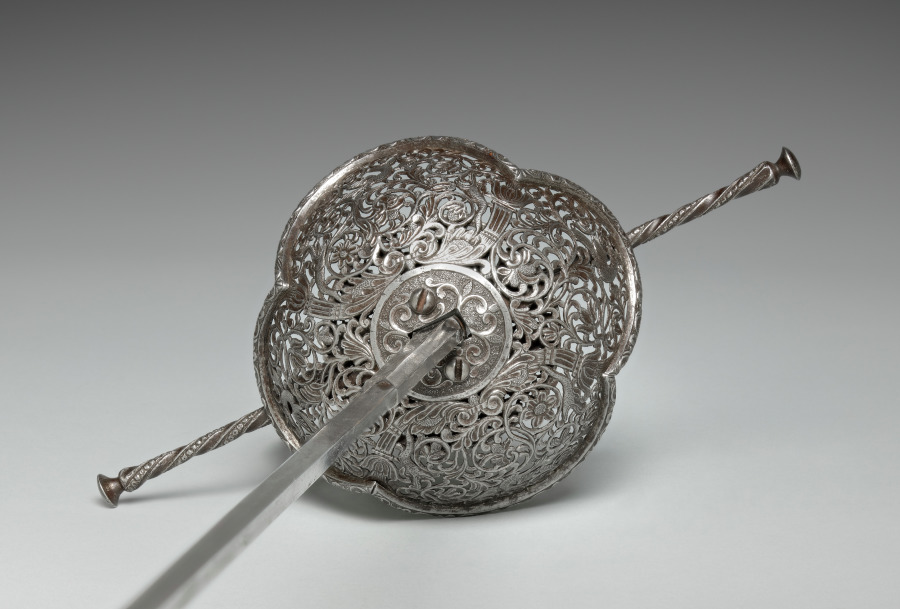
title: Cup-Hilted Rapier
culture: Spain, Toledo, 17th century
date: c. 1650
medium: Pierced and chiseled steel;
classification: Arms and Armor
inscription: PEDRO DEL MONTE/ IN TOLEDO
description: For parrying, rapiers were often made with accompanying daggers as a matched set. The aristocracy's taste for rich and intricate styles of decoration led to extravagant gilding, chiseling, piercing, enameling, and silvering. The more costly or unusual these weapons appeared, the more they were desired by the clientele who commissioned them, not only for dueling but also as the ultimate accessory.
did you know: The guard is richly decorated with chiseled and pierced arabesques, an ornamental design consisting of intertwined flowing lines.